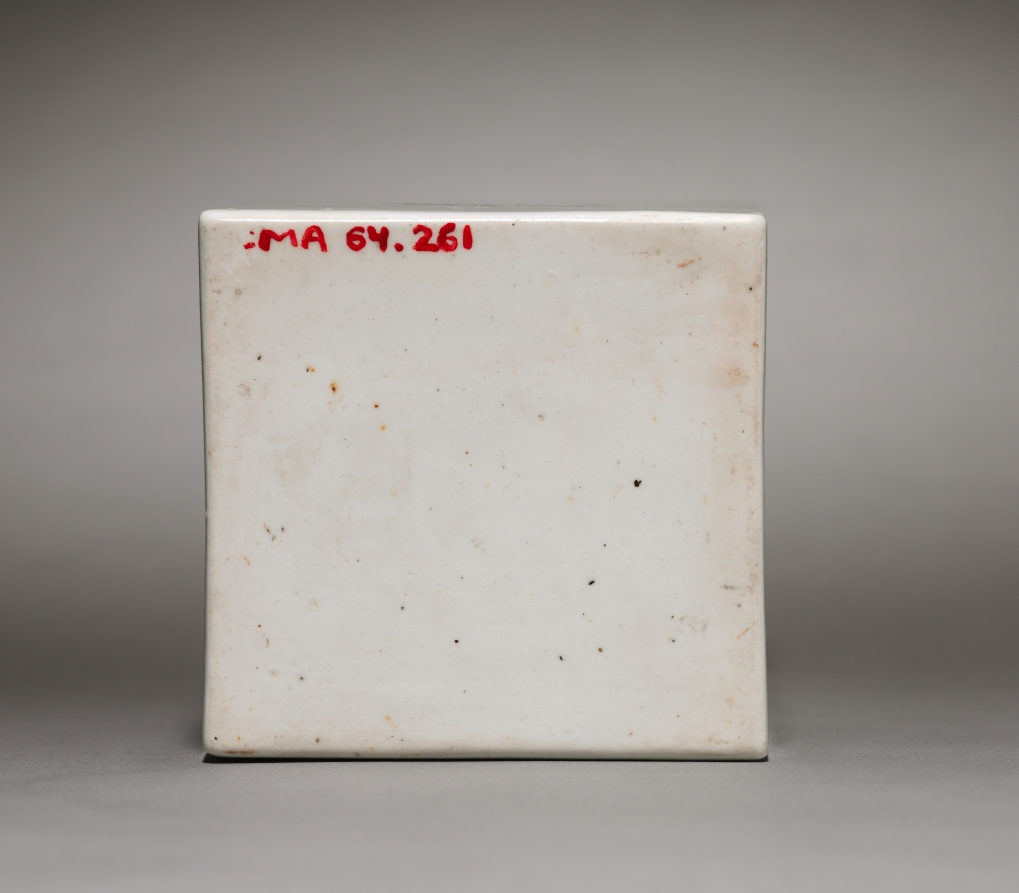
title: Square Bottle with Squirrel and Grapes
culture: Japan, Edo period (1615–1868)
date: late 1600s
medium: porcelain with overglaze color enamel (possibly Hizen ware, Kakiemon type)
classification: Ceramic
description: In the 1600s, Korean and Japanese elites could enjoy wine from Europe. In his 1636 travel diary called Haecharok, Kim Seryeom, a vice director of Korean envoys to Japan, recorded that the head of Japan’s Tsusima Island treated him to Western red wine. Therefore, export porcelain ware like Square Bottle with Squirrel and Grapes could have been made as a wine bottle.